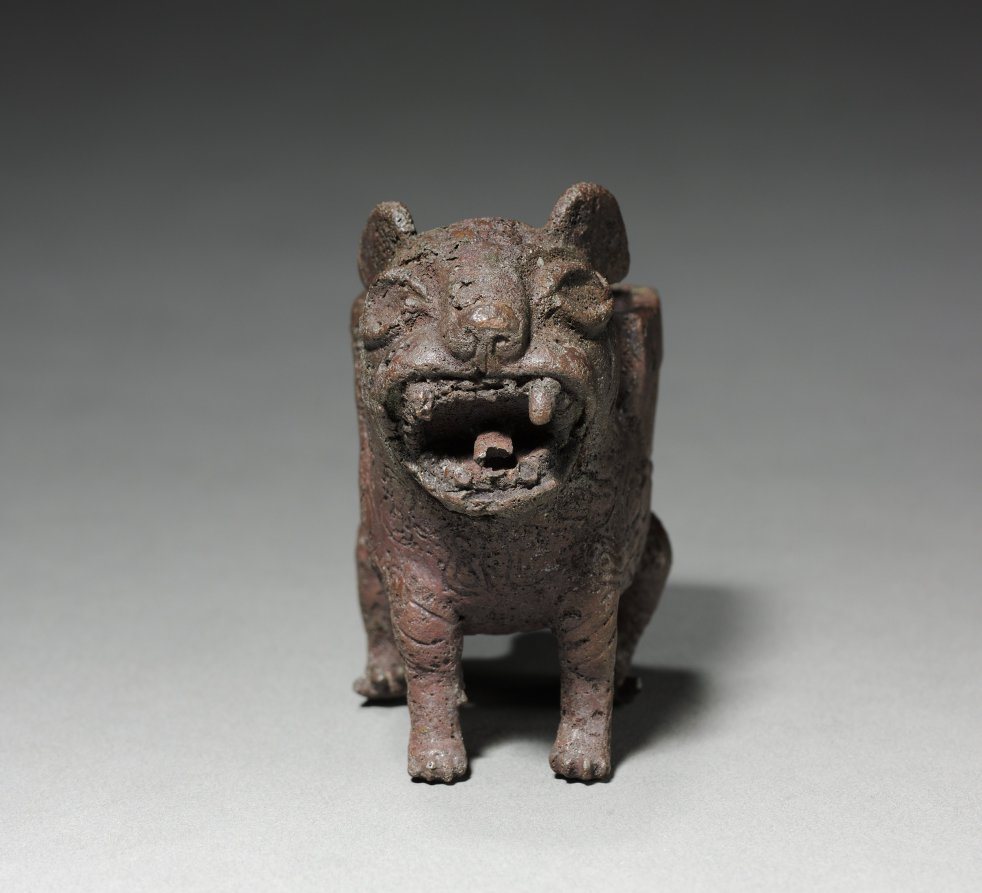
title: Male Feline-Shaped Container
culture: Peru, North Coast, Moche style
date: 50–800 CE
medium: cast copper alloy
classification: Sculpture